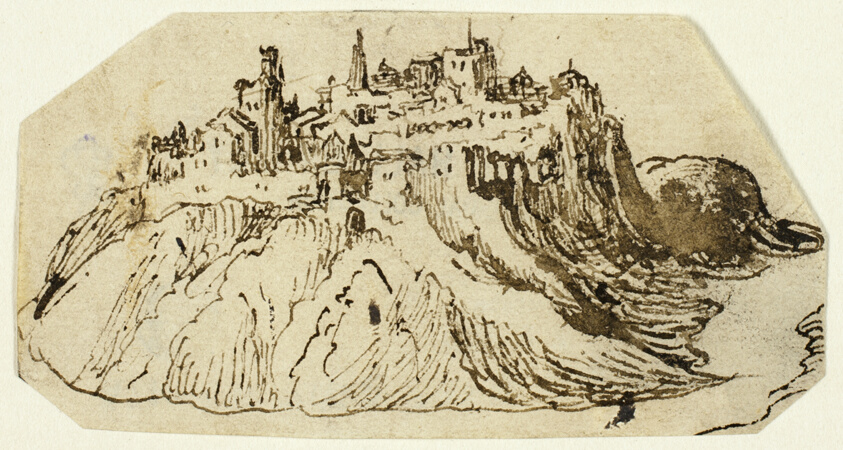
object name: Drawing and Watercolor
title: View of Fortified Hill Town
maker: Unknown Artist; Flemish, 17th century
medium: Pen and brown ink on cream laid paper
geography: Flanders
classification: pen and ink drawings; drawings (visual works); prints and drawing